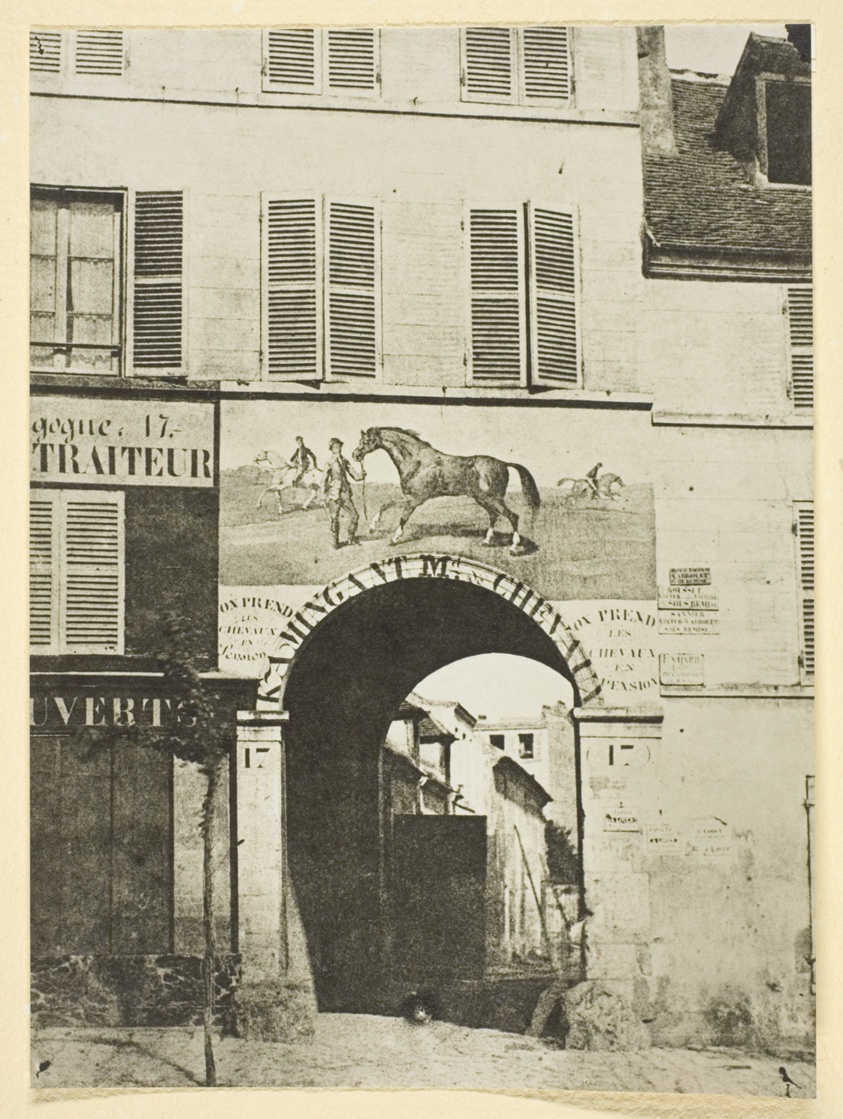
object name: Photograph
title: Enseigne d'un Marchand de Chevaux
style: 19th century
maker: Hippolyte Bayard (French, 1801–1887)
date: 1842/50, printed 1965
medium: Gelatin silver print, No. 20 from the portfolio "Bayard: XXV Calotypes, 1842-1850" (1965)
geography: France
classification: photographic process; photography; photograph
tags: Collected by Hugh Edwards